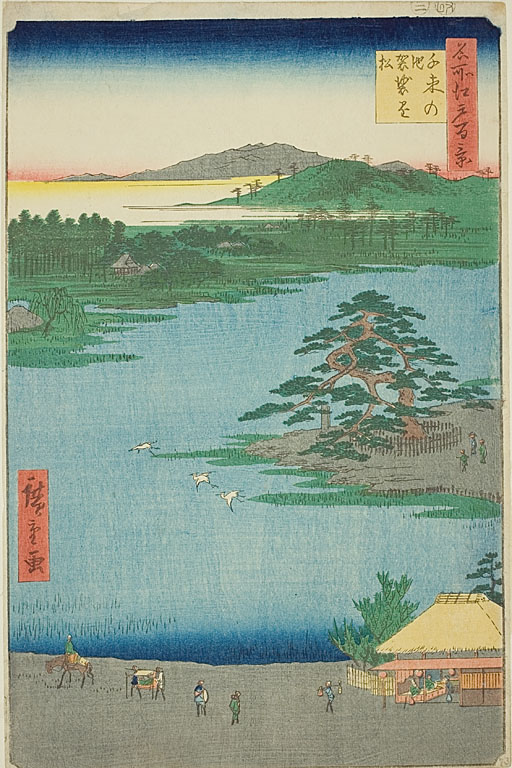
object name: Print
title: The Robe-hanging Pine at Senzoku Pond (Senzoku no ike Kesakakematsu), No.110 from the series "One Hundred Famous Views of Edo (Meisho Edo hyakkei)"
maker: Utagawa Hiroshige (Japanese, 1797-1858)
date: 1856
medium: Color woodblock print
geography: Japan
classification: woodblock print; print; asian art